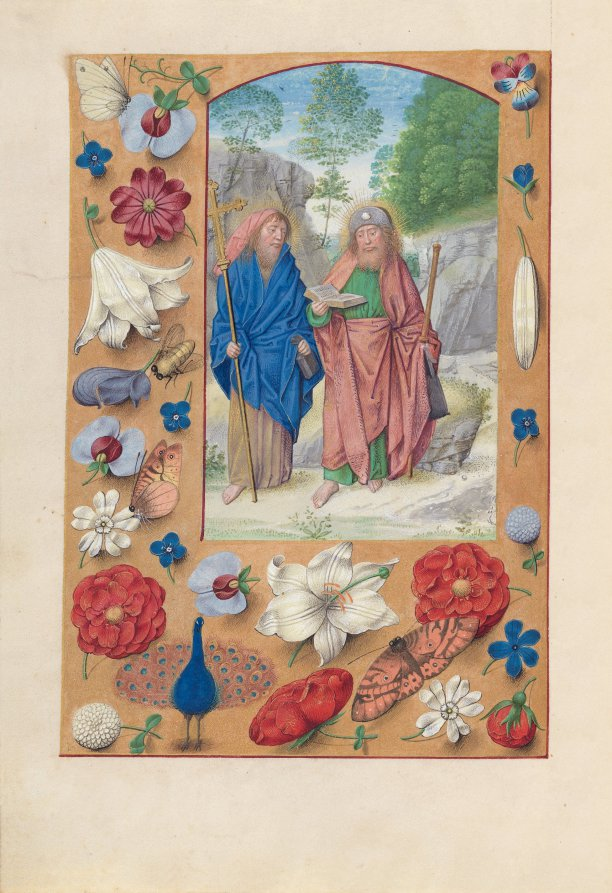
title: Hours of Queen Isabella the Catholic, Queen of Spain: Fol. 175v, Saints Philip & James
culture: Flanders, Ghent and Bruges, late 15th century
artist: Master of the First Prayerbook of Maximillian (Flemish, c. 1444–1519)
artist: and Associates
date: c. 1500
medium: ink, tempera, and gold on vellum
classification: Bound Volume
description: This manuscript was illuminated by a circle of at least five highly organized manuscript painters active in the Flemish cities of Ghent and Bruges. The principal illuminator was Alexander Bening, who painted the majority of the book's miniatures. Manuscripts produced by this circle of artists are renowned for the decoration of their borders, which typically feature a rich variety of realistically-painted flowers, birds, and butterflies. This prayer book, called a book of hours, was intended not for a cleric, but for the private devotions of a lay person-in this case, Isabella the Catholic, Queen of Spain (1451-1504). Isabella's coat of arms embellishes the book's frontispiece. It is unlikely that the book was commissioned by the Queen herself; rather, she probably received it as a diplomatic gift from someone courting her patronage, perhaps Cardinal Francisco Jimenez de Cisneros. A Franciscan friar, Jimenez was dependent upon Isabella for his advancement, first to the post of Queen's confessor in 1492, and then to Archbishop of Toledo in 1495.